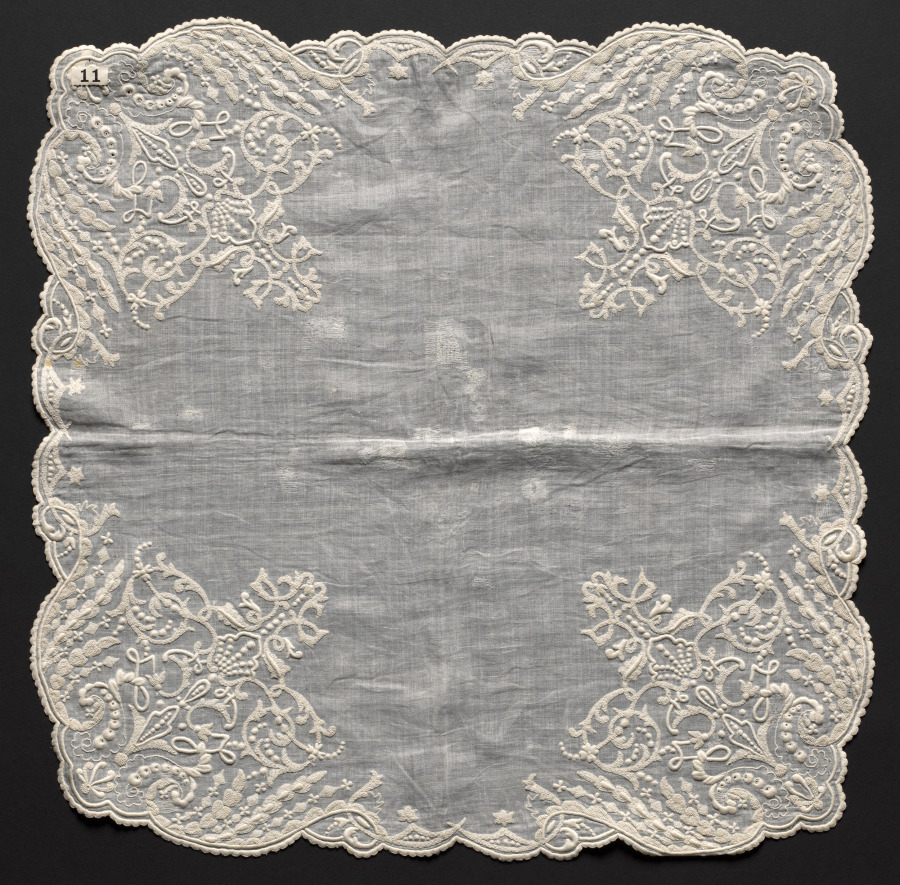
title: Embroidered Handkerchief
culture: Italy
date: 1800s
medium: Plain weave linen, embroidered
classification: Embroidery